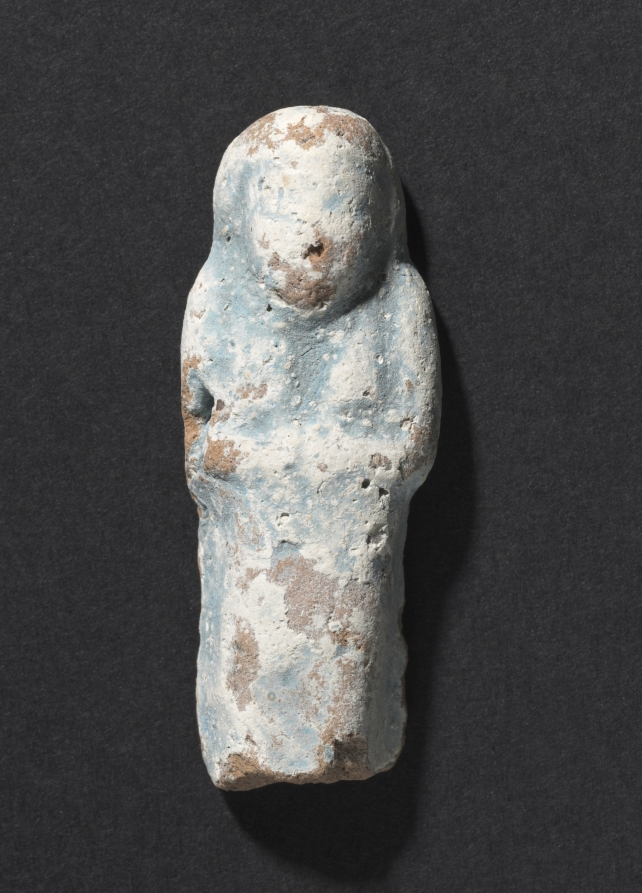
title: Shawabty of Ditamenpaankh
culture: Egypt, Late period (715–332 BCE), Dynasty 25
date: 715–656 BCE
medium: terracotta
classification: Funerary Equipment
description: High demand for shawabtys in the Late Period, a time when as many as 400 or more shawabtys were placed in the tomb with the deceased, gave rise to a specialized container for storing them: the shawabty box. This example is inscribed for the lady of the house, Ditamenpaankh, and was probably one of a pair originally made for her. The single-masted boat on the box's lid is perhaps an allusion to the pilgrimage of the deceased to the holy city of Abydos, the cult city of Osiris, king of the dead. The shawabtys inside are crude, mass-produced examples cast in an open mold. Made of terracotta, their blue paint imitates more costly shawabtys made of faience. As for the shawabty spell, it has been removed from its traditional location on the shawabty's front and relocated onto the sides of box, where it needed only to be written once, thus expediting production.